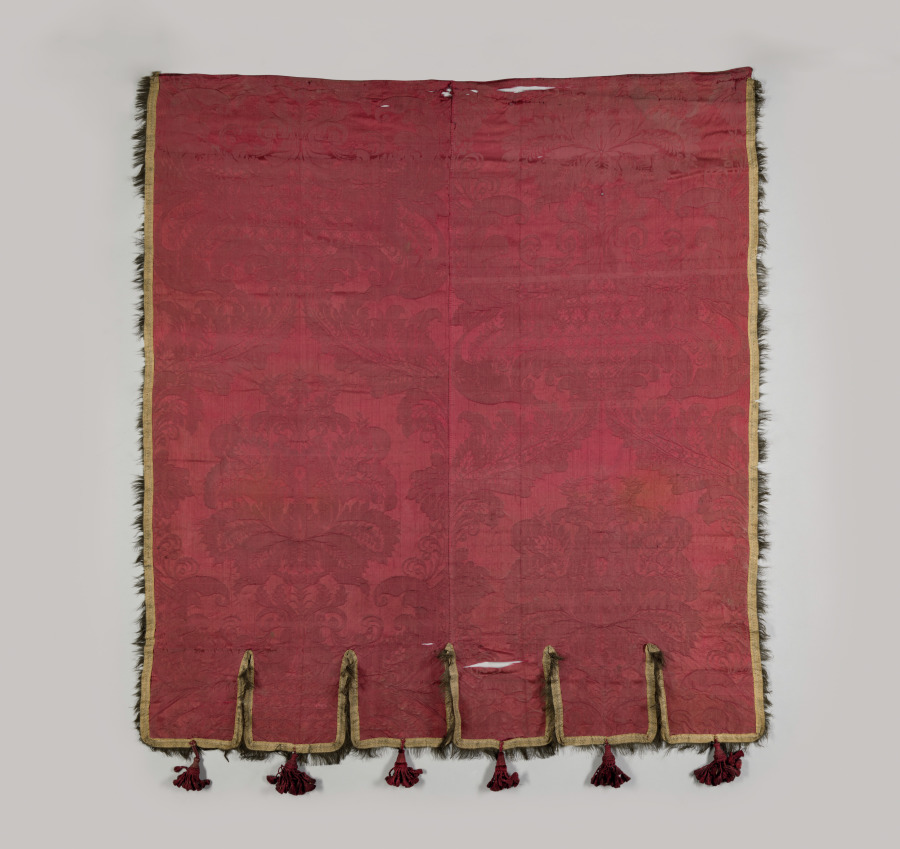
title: Banner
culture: Spain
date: 1700s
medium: crimson silk brocade; scalloped border with fringe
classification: Textile